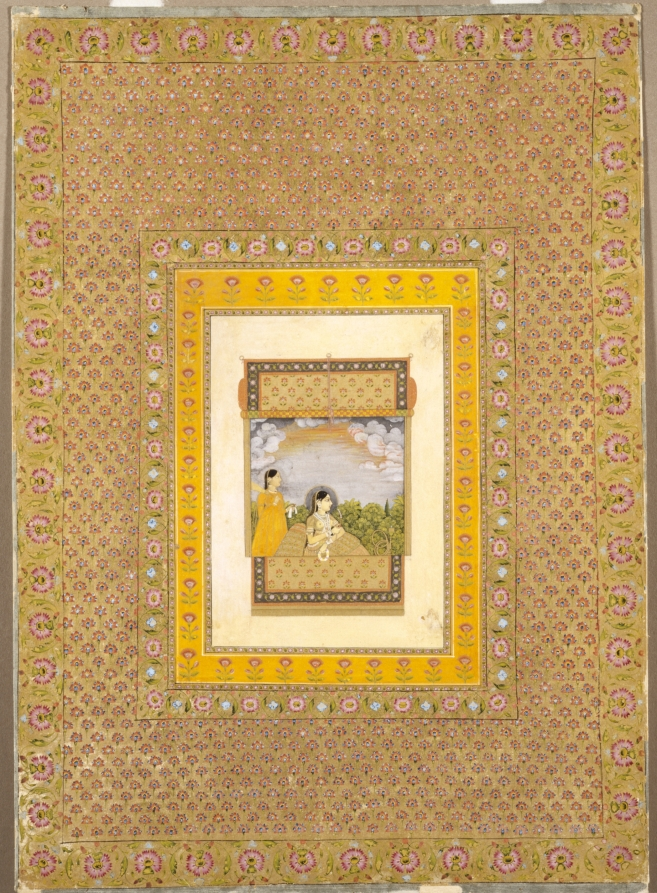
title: Princess and attendant in trompe l’oeil window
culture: Mughal India, Uttar Pradesh, Lucknow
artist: Aqil Khan (Indian, active mid-1700s)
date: c. 1765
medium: Gum tempera, ink, and gold on paper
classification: Painting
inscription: 'amal 'Aqil Khān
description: A golden window shade has been rolled up to reveal a princess seated on a terrace. The carpet draped over the sill echoes that of the balcony rail where royals would show themselves to the public. Rather than taking the view of an outsider, the viewer looks from inside the palace out to the women and the wooded landscape beyond. During the mid-1600s, the Mughal court introduced a preference for the patterns on carpets and textiles: flowering plants on a plain ground. This influential fashion derived from their appreciation of European botanical studies that merchants and diplomats brought to India.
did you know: Unlike in portraits of the emperor, women sit on the outside of the royal window.